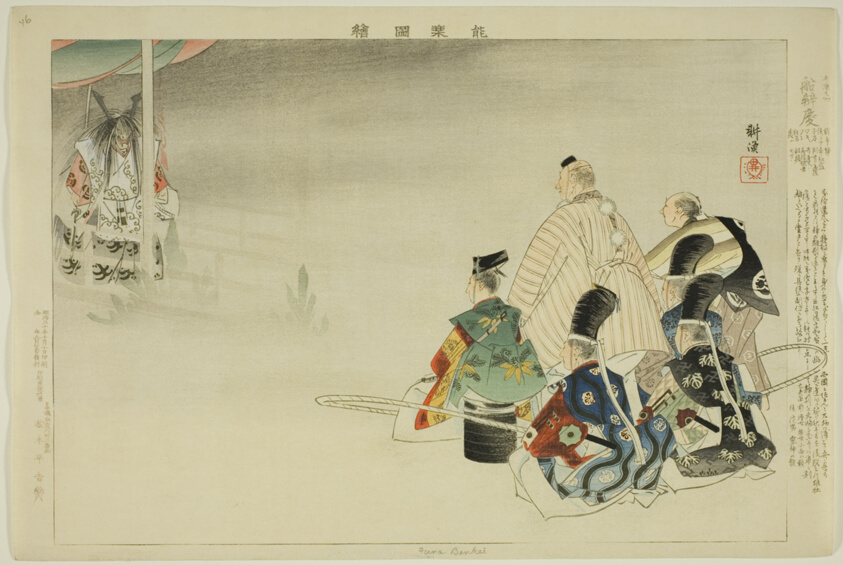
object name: Print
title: Funa-Benkei, from the series "Pictures of No Performances (Nogaku Zue)"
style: Japanese (culture or style)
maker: Tsukioka Kogyo; Japanese, 1869-1927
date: 1898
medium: Color woodblock print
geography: Japan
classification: woodblock print; print; asian art